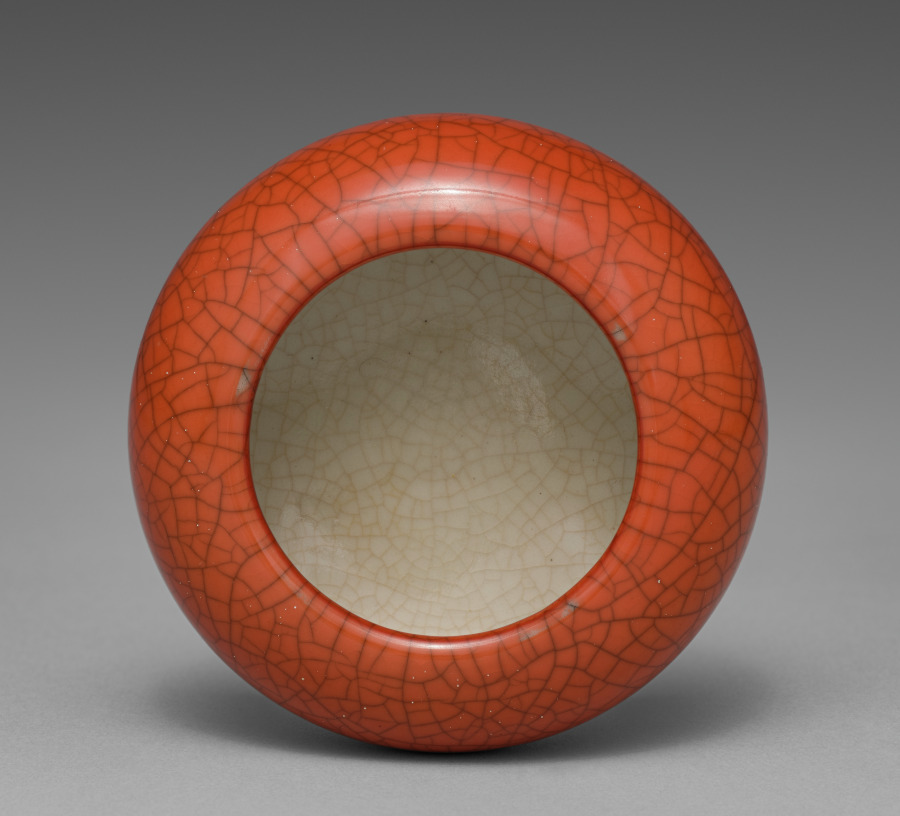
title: Incense Burner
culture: Japan, Meiji period (1868–1912)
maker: Seifū Yohei III (Japanese, 1851–1914)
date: 1893–1914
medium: Porcelain with coral red and crackled glaze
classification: Ceramic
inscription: 清風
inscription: "Hyatt King"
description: The tiniest of containers, this ovoid tripod is an incense burner. It likely once had an openwork metal lid. It is remarkable for its coral red color and crackled glaze. In contrast to the exterior, the interior has been left white under a transparent glaze. The “coral red glaze” is one Yohei III developed in 1887 and called sangōyu. Sensational among colors known at that time, Yohei III won first prize for his work glazed with it at the annual exhibition of the Japan Art Association (Bijutsu Kyokai) in 1888.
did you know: Seifū Yohei III’s incense burner has a red glaze that is difficult to achieve.